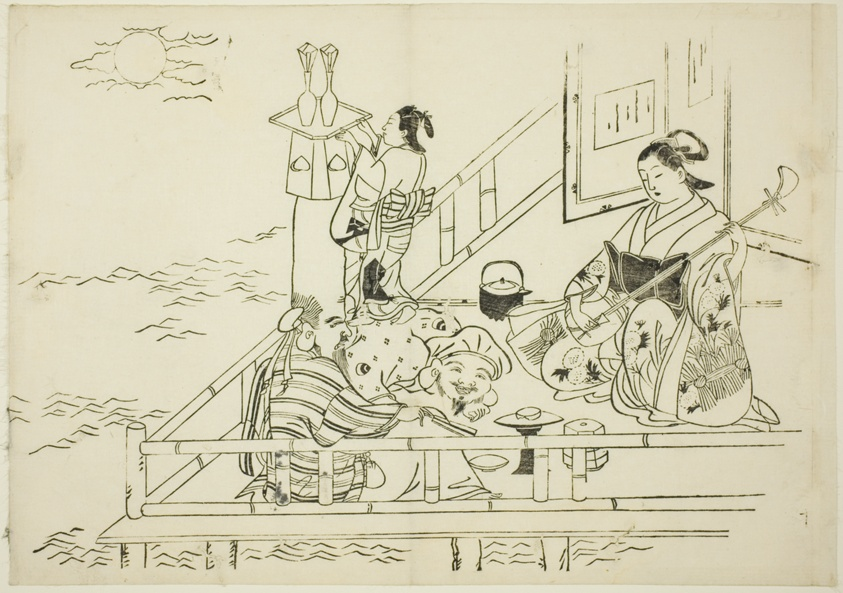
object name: Print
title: Courtesan entertaining Daikoku and Fukurokuju, no. 10 from a series of 12 prints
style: Japanese (culture or style)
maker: Okumura Masanobu (Japanese, 1686-1764)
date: c. 1708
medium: Woodblock print; oban, sumizuri-e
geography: Japan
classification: woodblock print; print; asian art; woodblock